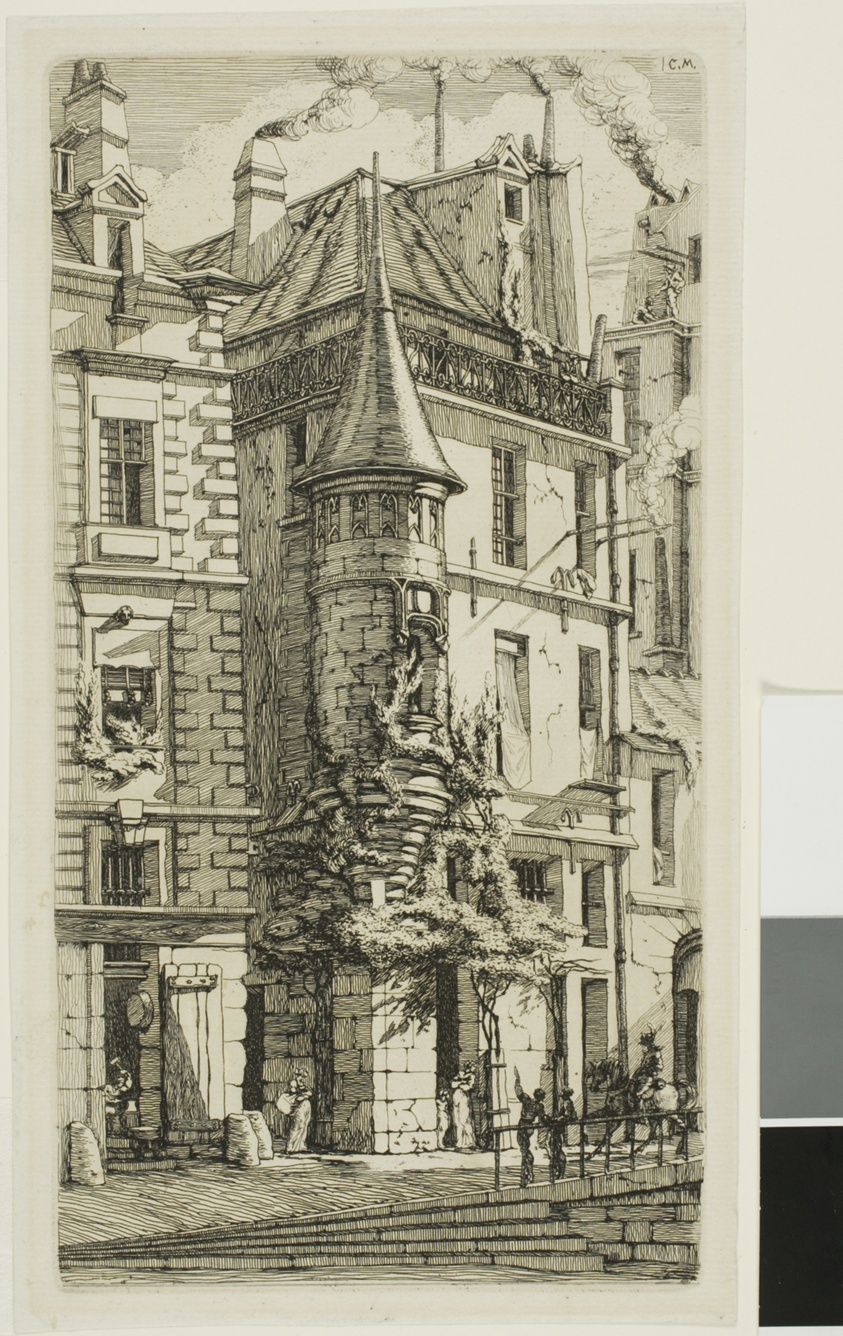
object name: Print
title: House with a Turret, rue de la Tixéranderie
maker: Charles Meryon (French, 1821-1868)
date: 1852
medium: Etching on ivory laid paper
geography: France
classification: etching; print; prints and drawing